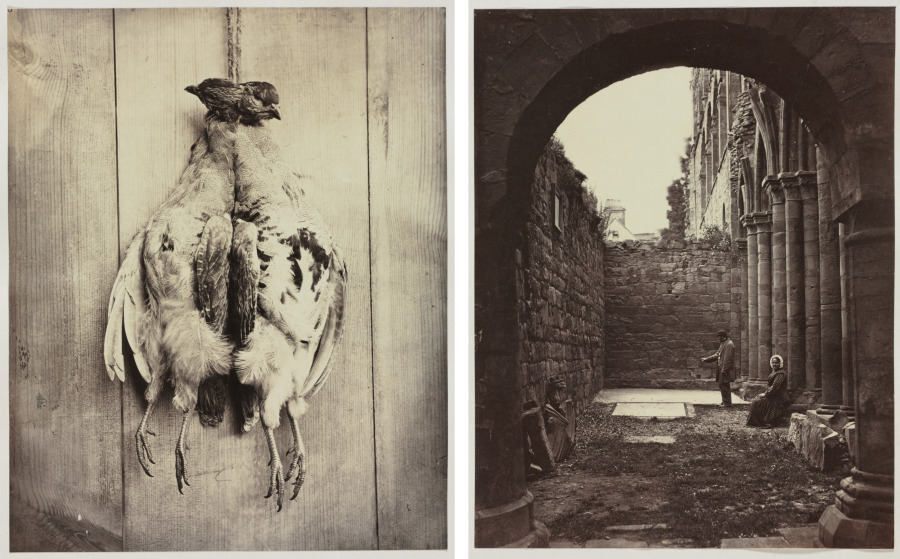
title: Partridges (recto); L.D. Campbell's Tomb (verso)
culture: England, 19th century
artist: Captain N. Baily (British)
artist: John Hamilton Craigie (British)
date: c. 1861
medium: albumen print from wet collodion negative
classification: Photograph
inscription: Written in ink on pasted paper on recto: "Partridges/W. Baily, Esq." (writing on back of pasted label)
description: N. Baily carefully arranged a simple composition of two partridges hanging by a thin rope against a plain wood wall. Like many photographers in the 1850s and 60s, he was interested in displaying the camera’s ability to record in detail the variety of shapes and textures present in the still life. Little is known of Baily, a British amateur photographer. He was a member of the Amateur Photographic Association and participated in several of their album exchanges. Still lifes incorporating game, fowl, and fish were popular among amateur photographers during this period. Many members of the Amateur Photographic Association were gentlemen that formerly belonged to the British armed forces and would have participated in hunting as a pastime.